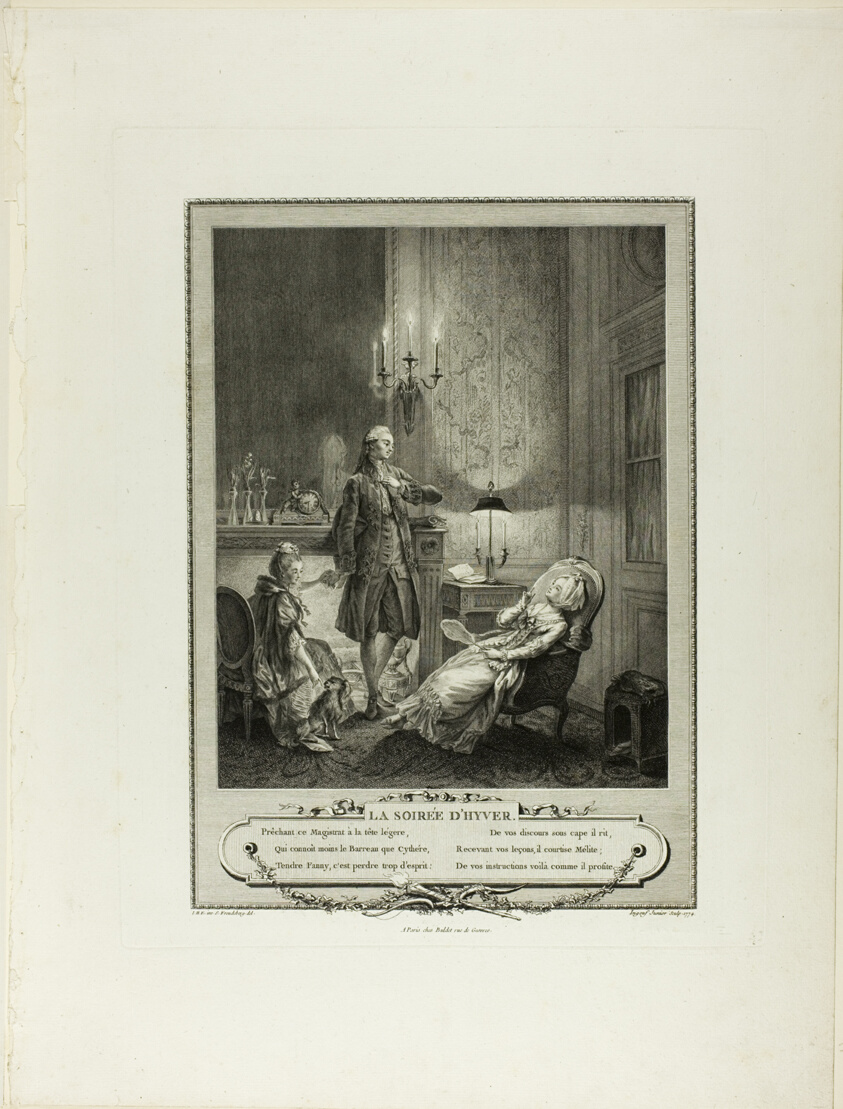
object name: Print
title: Winter Evening, from Monument du Costume Physique et Moral de la fin du Dix-huitième siècle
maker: François Robert Ingouf (French, 1747-1812); after Sigmund Freudeberg (Swiss, 1745-1801) and Jean Henri Eberts (Swiss, 18th century); published by Laurent-François Prault (French 1712-1780)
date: 1774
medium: Engraving on paper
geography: France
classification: etching; print; prints and drawing